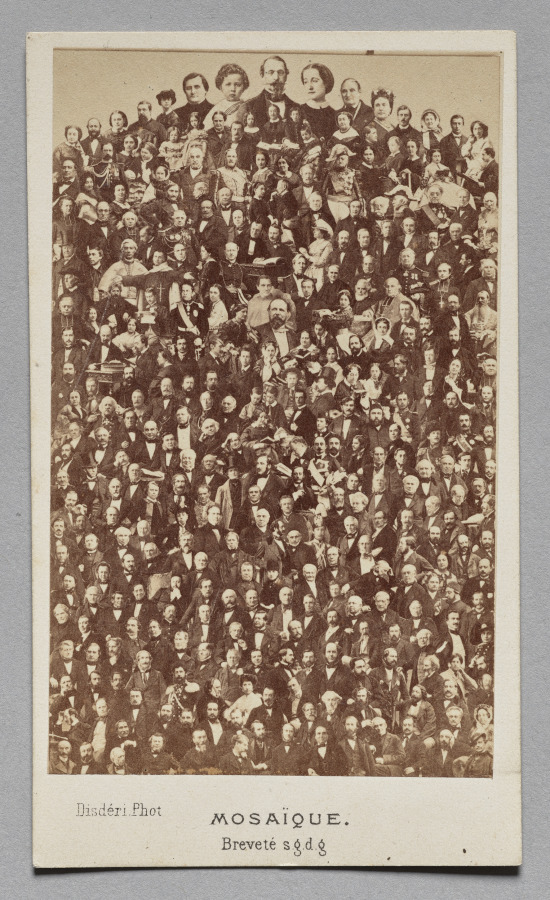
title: Mosaique: The Imperial Court of Napoleon III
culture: France, 19th century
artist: André Adolphe-Eugène Disdéri (French, 1819–1889)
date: c. 1866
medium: albumen print, montage carte-de-visite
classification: Photograph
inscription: Imprinted in black type on recto of mount: “Disdéri Phot/MOSAIQUE./Breveté s g.d.g”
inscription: Written in pencil on verso of mount: “100”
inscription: Imprinted in black type on verso of mount: “Disdéri/Photographe de S.M. L’Empereur/8, Boulevart des Italiens/Paris”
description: The mosaic cards offered visual catalogues of the luminaries of a profession or social group in a single photograph. Here the emperor, his wife, and son top a pyramid of statesmen, soldiers, artists, writers, and others affiliated with the imperial court. This image was produced by cutting hundreds of figures photographed by Disdéri away from their backgrounds, mounting the likenesses on a single sheet, photographing that collage, and printing it on 6 x 9 cm cards.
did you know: Disdéri bragged that the mosaique could offer a picture of “from two or three persons up to a thousand for the same price” as a photograph of one individual.